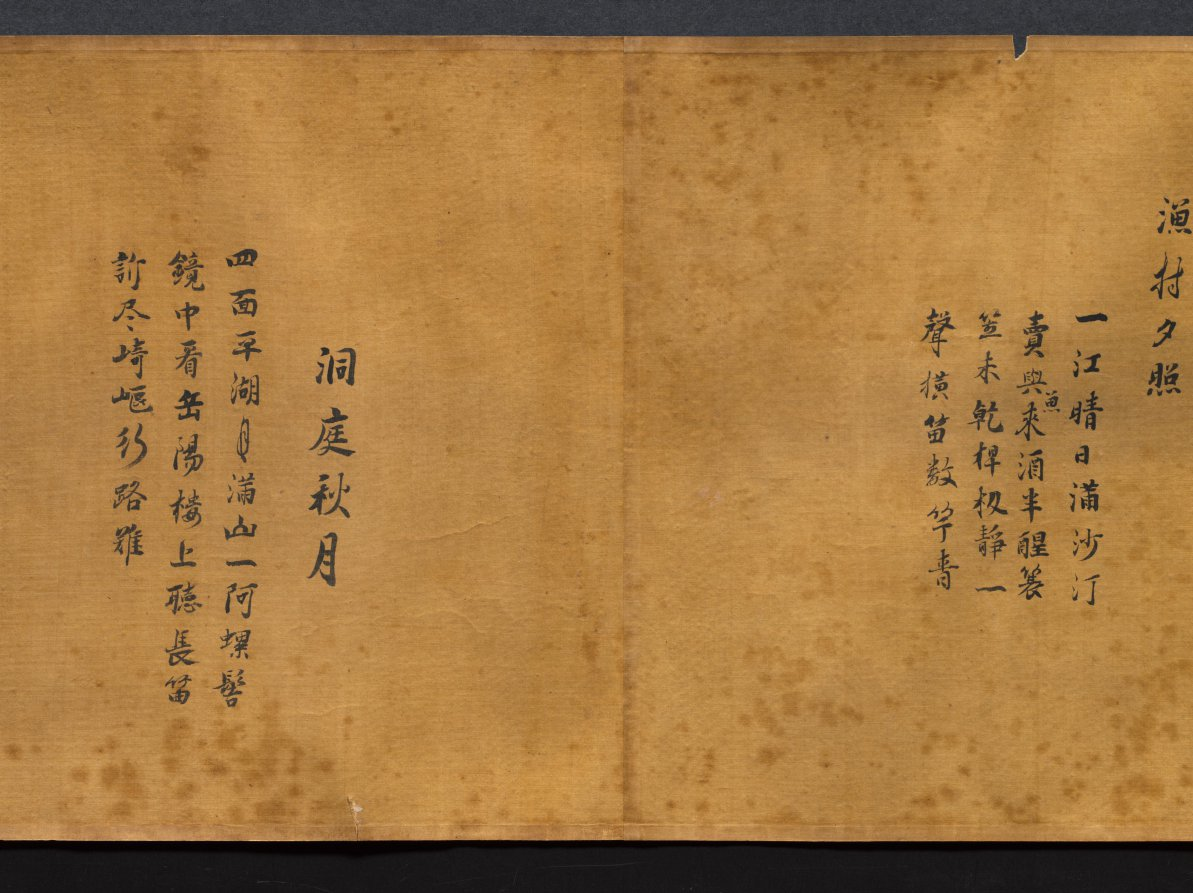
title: Eight Views of Xiao-Xiang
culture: Japan, Edo period (1615–1868)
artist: Kano Tan’yū (Japanese, 1602–1674)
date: 1615–1868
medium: handscroll; ink on silk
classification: Painting